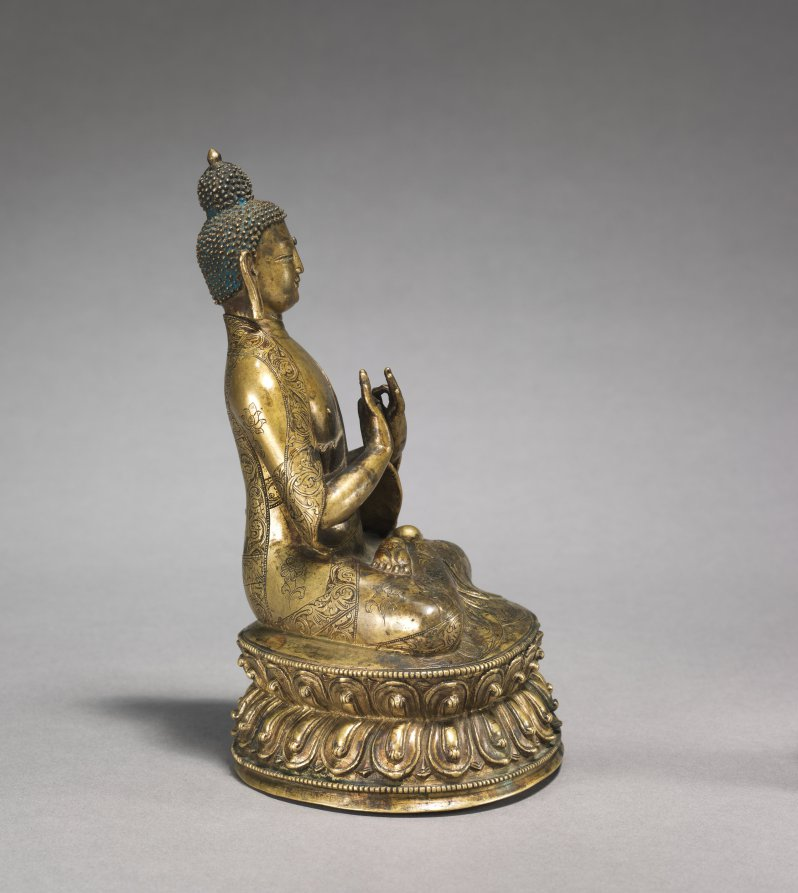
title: Seated Maitreya Buddha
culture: Western Tibet, Yongle Period (1403-1424)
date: c. 1400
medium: bronze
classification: Sculpture